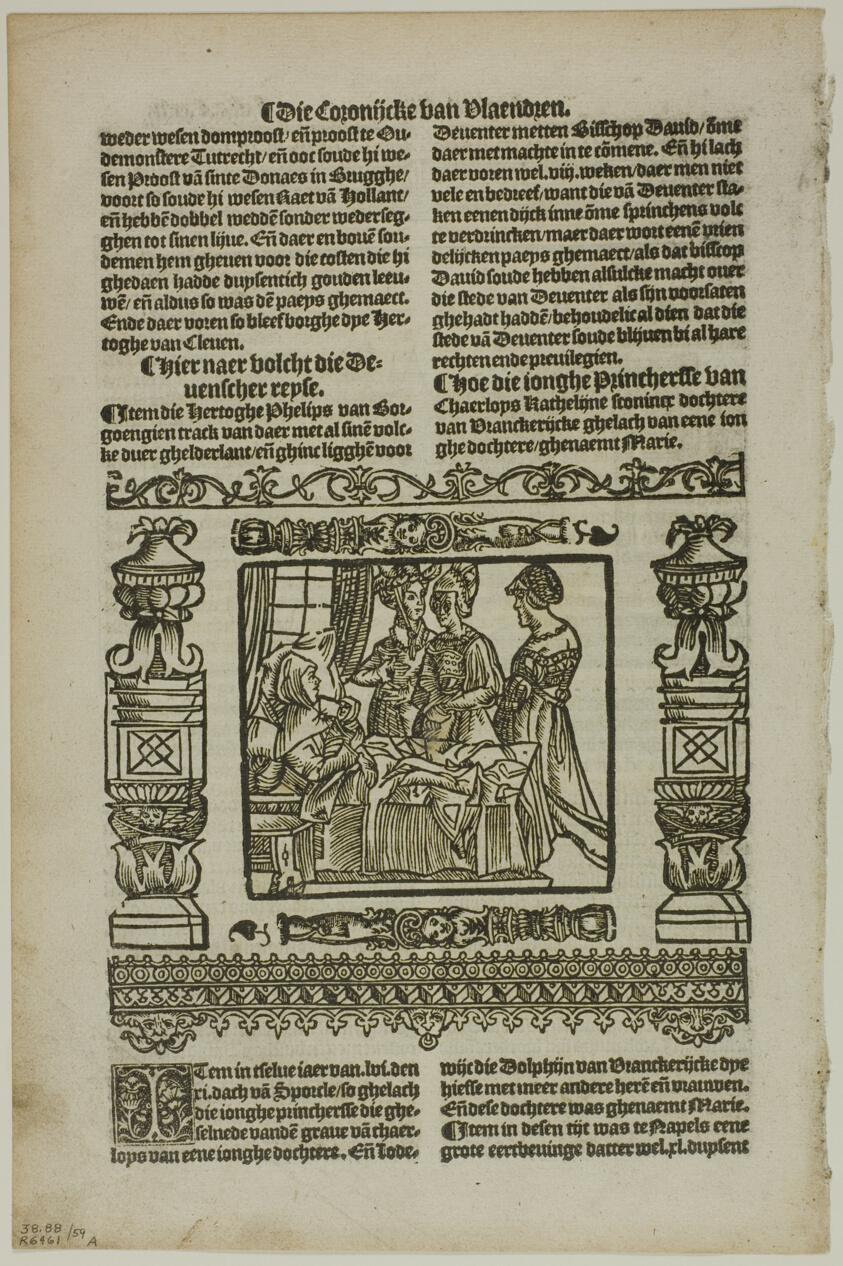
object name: Print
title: Illustration from Coronijke van Flaendren, plate 59 from Woodcuts from Books of the XVI Century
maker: Unknown Artist (German, 16th century); assembled by Max Geisberg (Swiss, 1875-1943)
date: 1531, assembled into portfolio 1937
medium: Woodcut on paper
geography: Germany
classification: woodcut; print; prints and drawing